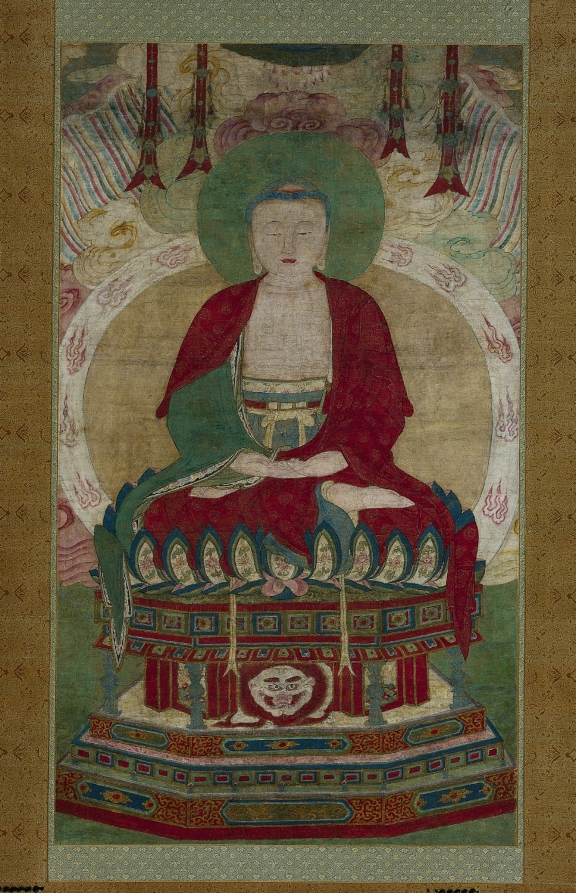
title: Seated Amitābha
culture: Chinese, Ming dynasty (1368-1644)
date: late 1500s–early 1600s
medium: hanging scroll; ink and color on silk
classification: Painting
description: This magnificent Buddha, called Amitābha (literally, “infinite light”) is seated on a lotus pedestal with both palms facing up over crossed legs, suggesting that it is in deep meditation. In contrast to the richly ornamented throne on which the Buddha is seated, the figure itself is devoid of any jewelry or decorative attributes, emphasizing its enlightened status and detachment from worldly affairs. The lion head in the center of the pedestal is a motif from Central Asia, which can also be seen in the halo or nimbus of Chinese Buddhist stone steles.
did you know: Originally, this scroll was acquired by the museum as a Korean work, but has now been tentatively reattributed as Ming period Chinese.